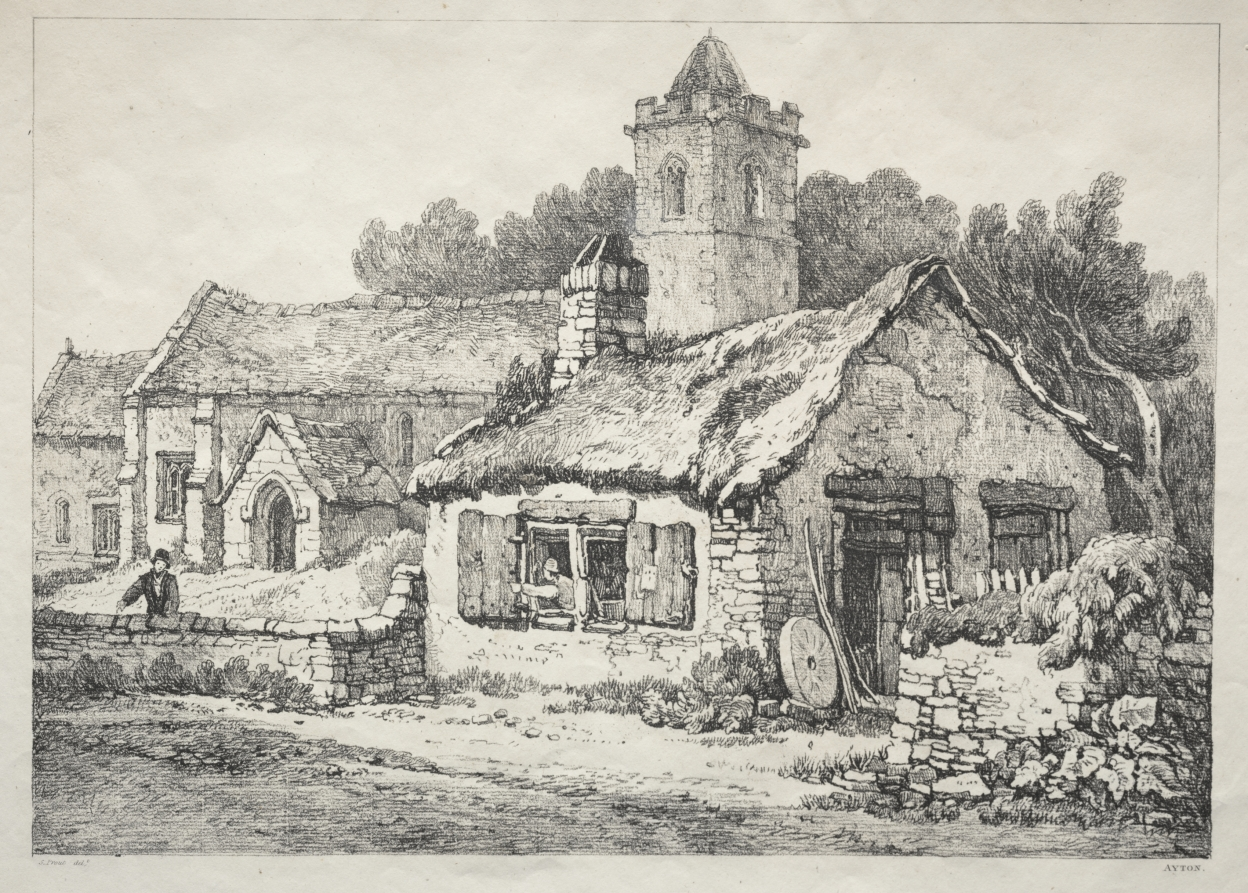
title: A Series of Ancient Buildings and Rural Cottages in the North of England: Ayton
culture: England, 19th century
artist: Samuel Prout (British, 1783–1852)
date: 1821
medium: softground etching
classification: Print